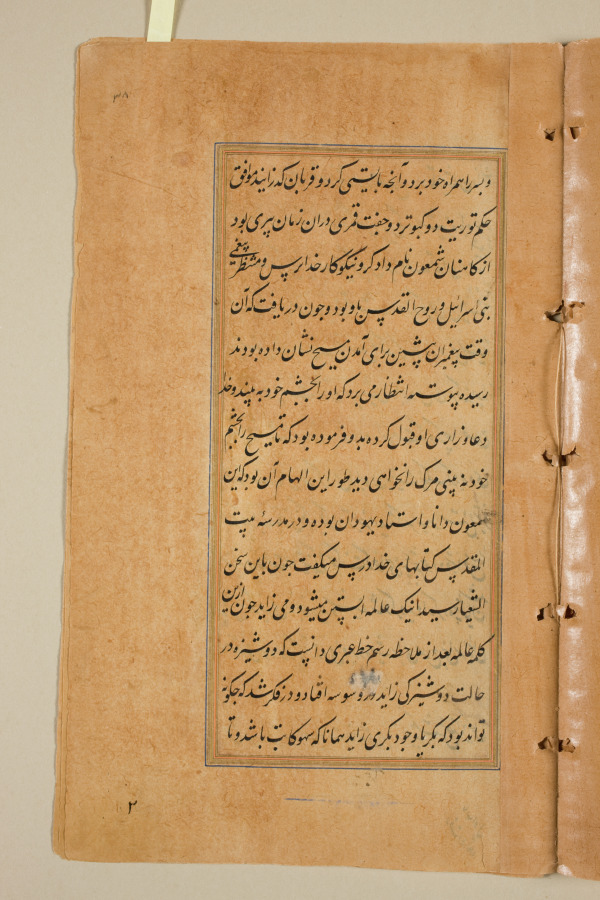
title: Text page from a Mirror of Holiness (Mir’at al-quds) of Father Jerome Xavier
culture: Mughal India, Allahabad, made for Prince Salim (1569–1627)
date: 1602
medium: Ink and gold on paper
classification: Manuscript